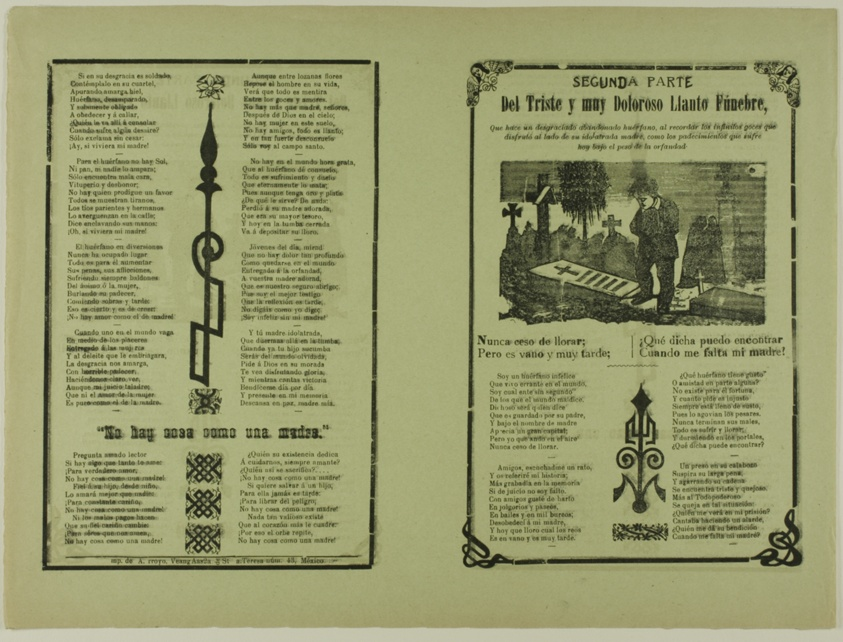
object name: Print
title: Segunda parte del triste y muy doloroso llanto fúnebre (Second Part of the Sad and Very Painful Funeral Cry)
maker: Attributed to Manuel Manilla; Mexican, 1830-c. 1900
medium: Relief print on paper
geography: Mexico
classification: relief etching; print; prints and drawing